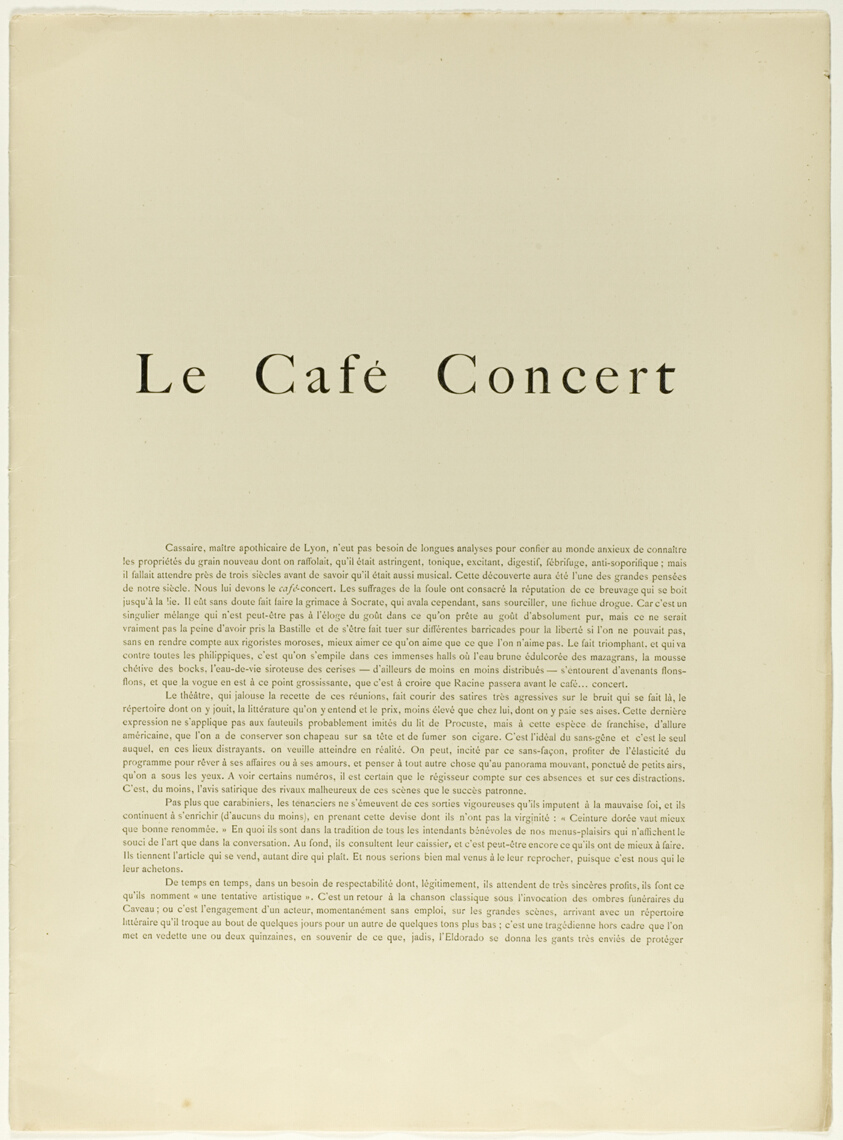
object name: Print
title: Text Booklet for Le Café-Concert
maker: Text by Georges Montorgueil (French, 1837-1933); printed by Léon Frémont (French, 18th-19th century); published by L'Estampe originale (French, 1893-1895)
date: 1893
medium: Title page and thirteen pages of printed text on cream wove paper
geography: France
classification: lithograph; print; prints and drawing